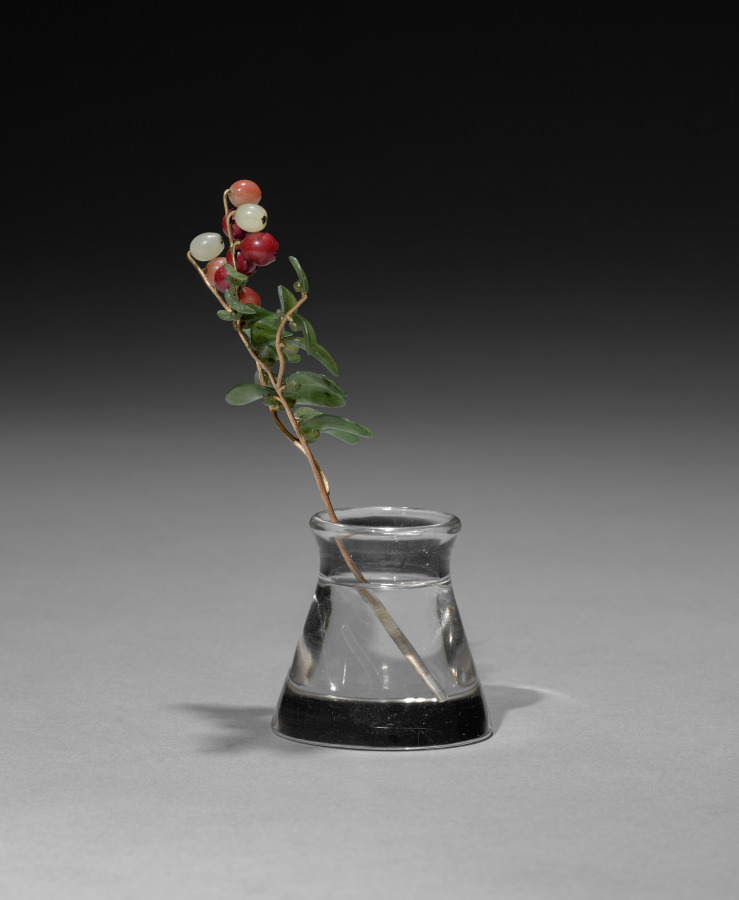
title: Flower Study of a Lowbush Cranberry or Lingonberry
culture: Russia, St. Petersburg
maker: House of Fabergé (Russian, 1842–1918)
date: c. 1885–1915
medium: chalcedony, jade, rock crystal, gold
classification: Miscellaneous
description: This flower study depicts a lowbush cranberry or lingonberry. To achieve a naturalistic effect of ripening fruit, Fabergé varied the coloring of the berries. Some are made of chalcedony in hues of milky white to represent unripe berries, while others appear in deep reddish agate to represent ripe ones. Fabergé’s inspiration for his flower studies is said to have come from the floral brooches of precious stones that were made in the 1700s for Catherine the Great as well as from the Japanese art of flower arranging, known as ikebana. Fabergé’s flower studies were given as intimate gifts to friends by the tsarina and others in the court. She also liked to take them around to wherever the imperial family was residing as a reminder of spring during the harsh Russian winters.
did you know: The stems of Fabergé’s flower studies are set into little basins carved from rock crystal to resemble pots of water.